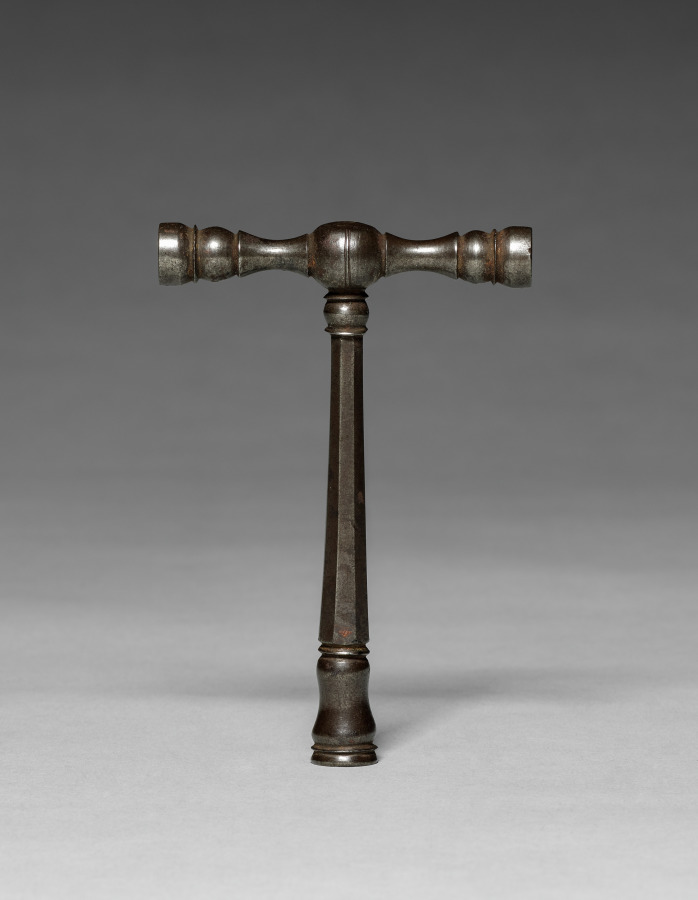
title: Key Wrench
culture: Europe, 18th century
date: 1700s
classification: Tool